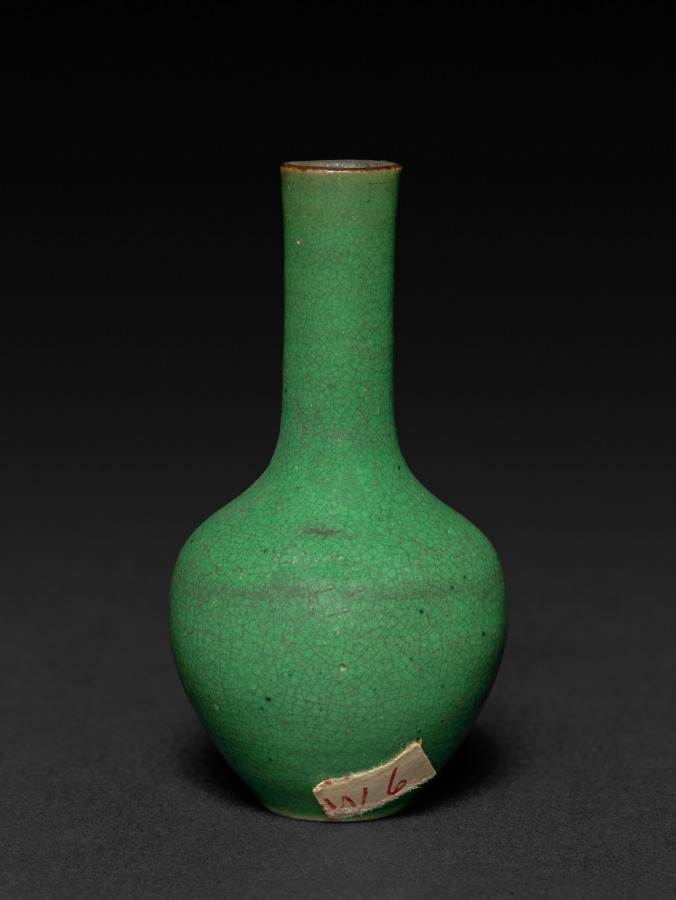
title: Vase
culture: China, Qing dynasty (1644-1911)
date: 1644–1911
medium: porcelain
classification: Ceramic